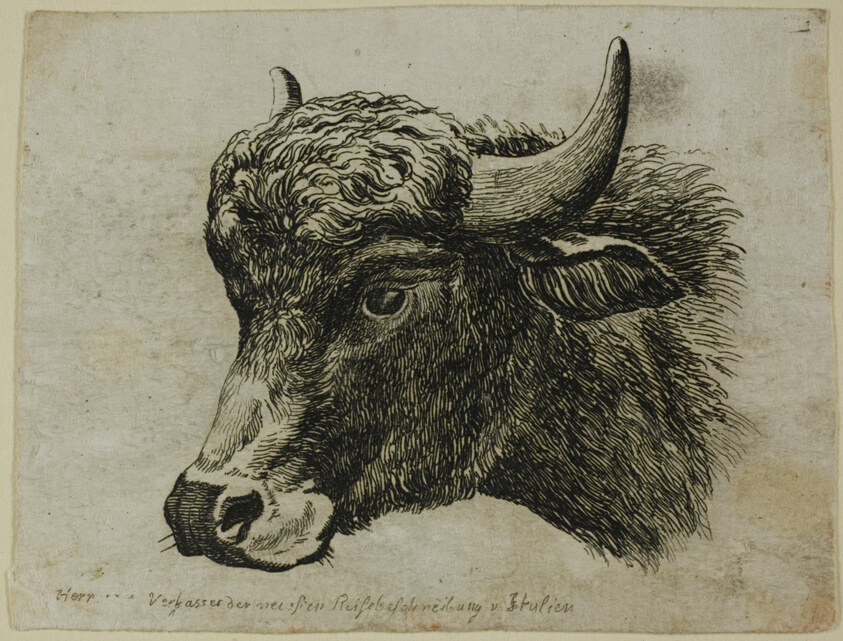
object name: Print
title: Buffalo Head Facing Left, from Die Zweite Thierfolge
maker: Johann Christian Reinhart (German, 1761-1847)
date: 1799/1803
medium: Etching on ivory laid paper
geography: Germany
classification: etching; print; prints and drawing